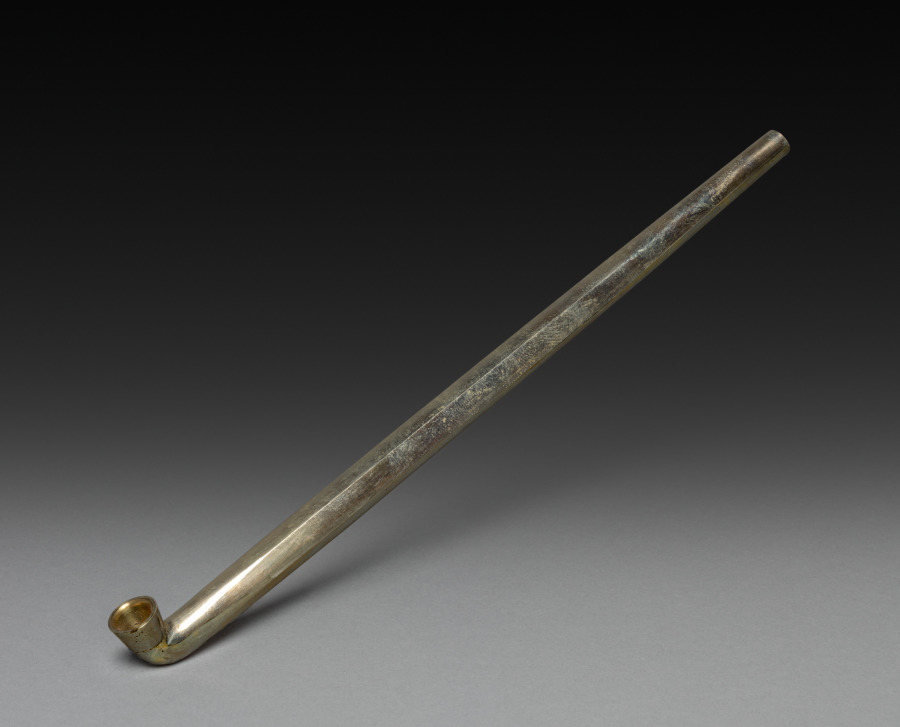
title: Tobacco Pipe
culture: Japan, Edo period (1615–1868)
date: early to mid-1800s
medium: metal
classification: Miscellaneous